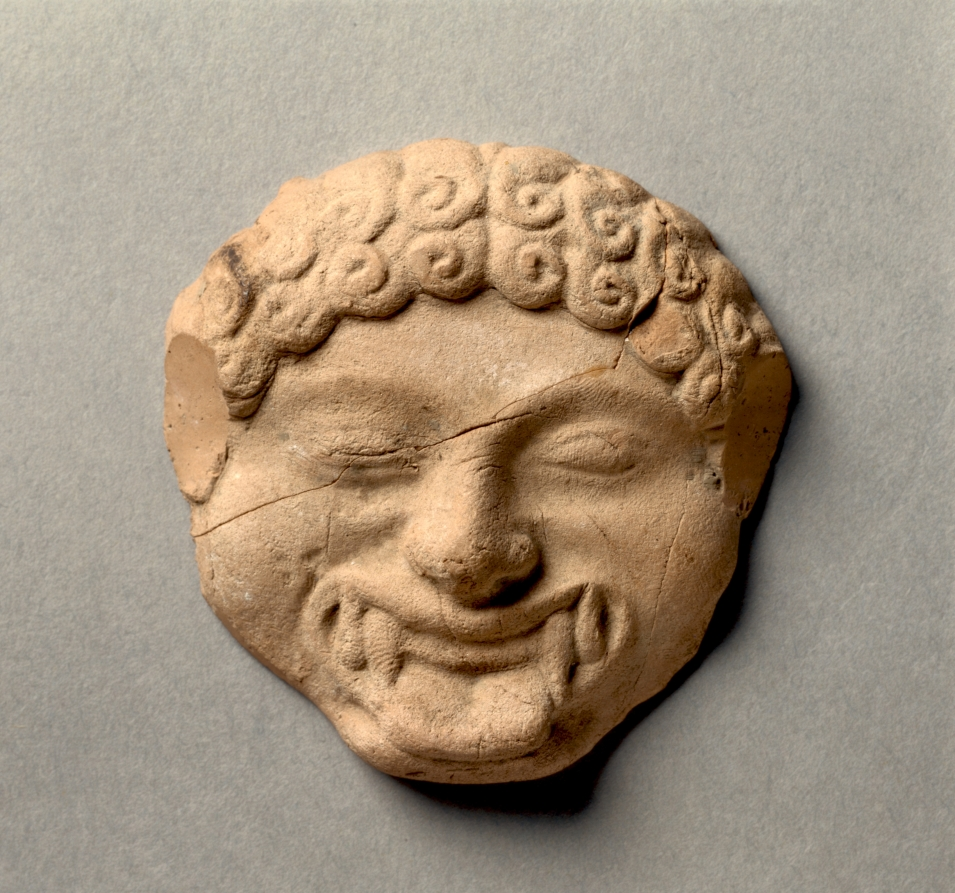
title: Gorgoneion Plaque with Incised Figure of a Dancing Satyr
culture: Greece, South Italy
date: c. 525–475 BCE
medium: terracotta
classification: Sculpture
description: Probably meant to decorate the outside of a wooden coffin or other tomb furniture, this small mold-made terracotta plaque is one of two in the collection (click here for the other). Both bear gorgoneia, or frontal Gorgon faces, with snaky hair, sharp teeth, and protruding tongue, perhaps meant to ward off evils. Curiously, this plaque also features decoration on its back side, in the form of a spirited dancing satyr incised into the clay before firing. Since this satyr would not have been visible once the plaque was in place, its purpose is uncertain. Was it simply diversion for the artisan who made it, or meant to protect the spirit of the deceased?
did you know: This plaque includes a very rare ancient sketch: a satyr incised on the reverse surface.